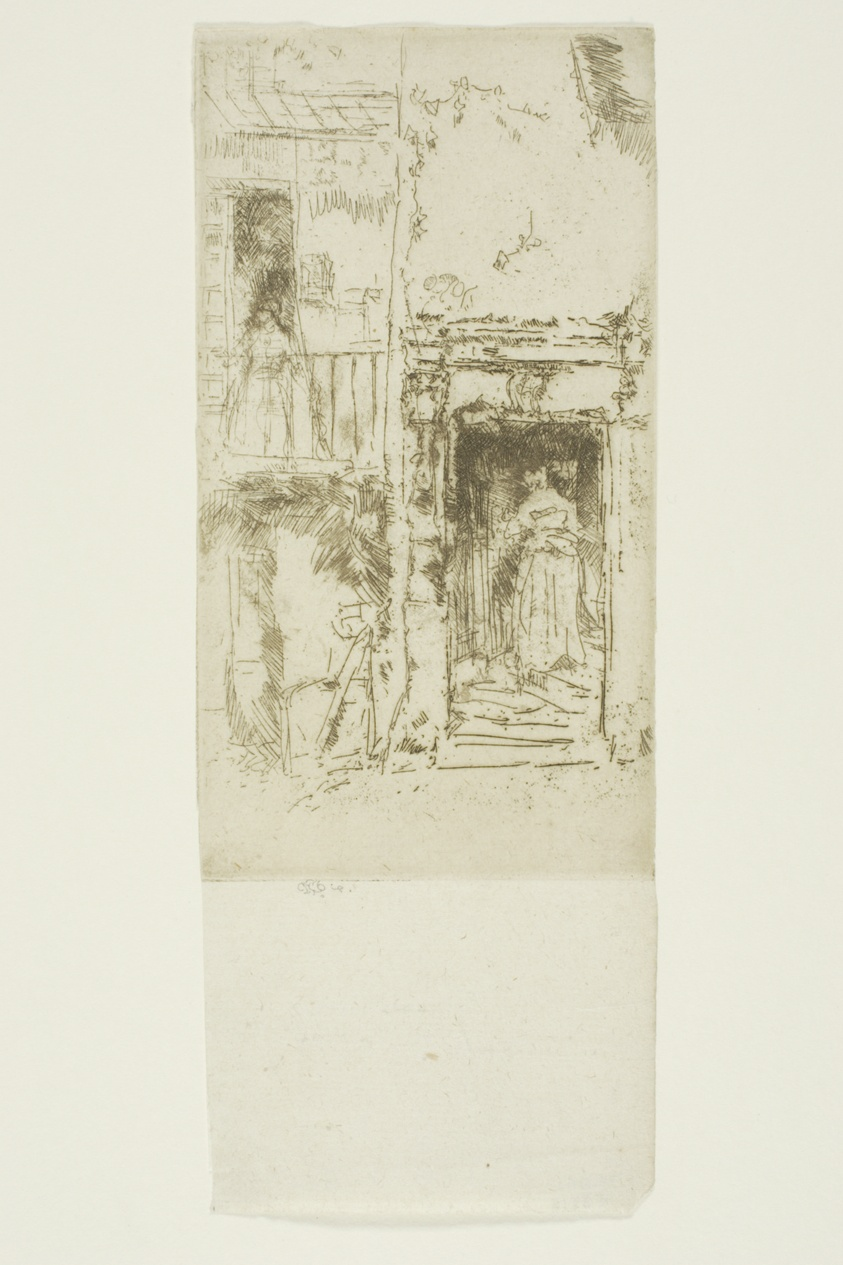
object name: Print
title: Doorway, Stables - Loches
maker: James McNeill Whistler (American, 1834-1903)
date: 1888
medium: Etching and drypoint with foul biting in brown ink on cream laid paper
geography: United States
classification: etching; foul biting; print; prints and drawing; paper; drypoint